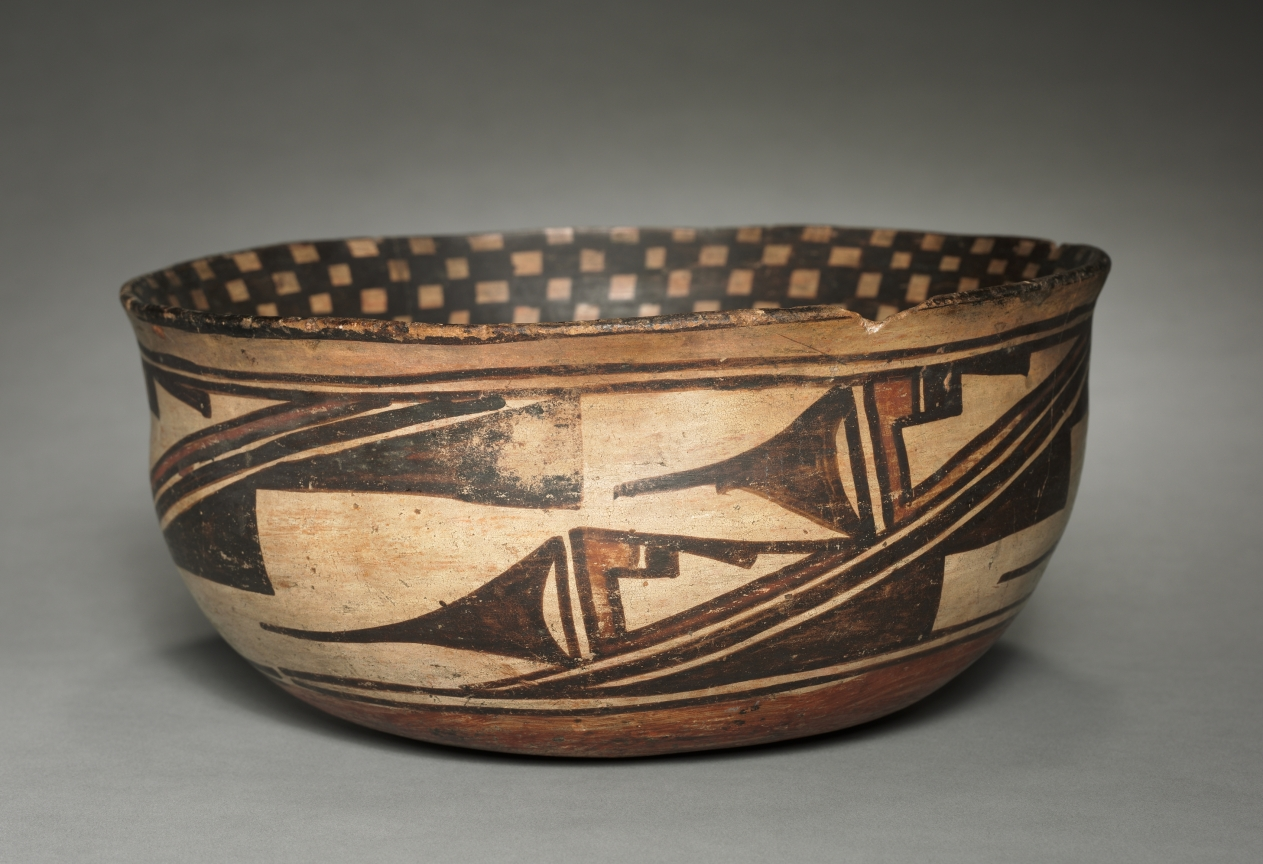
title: Stew Bowl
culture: Southwest,Pueblo, Hopi, Post-Contact Period, 20th century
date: 1870– 1880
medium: ceramic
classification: Ceramic